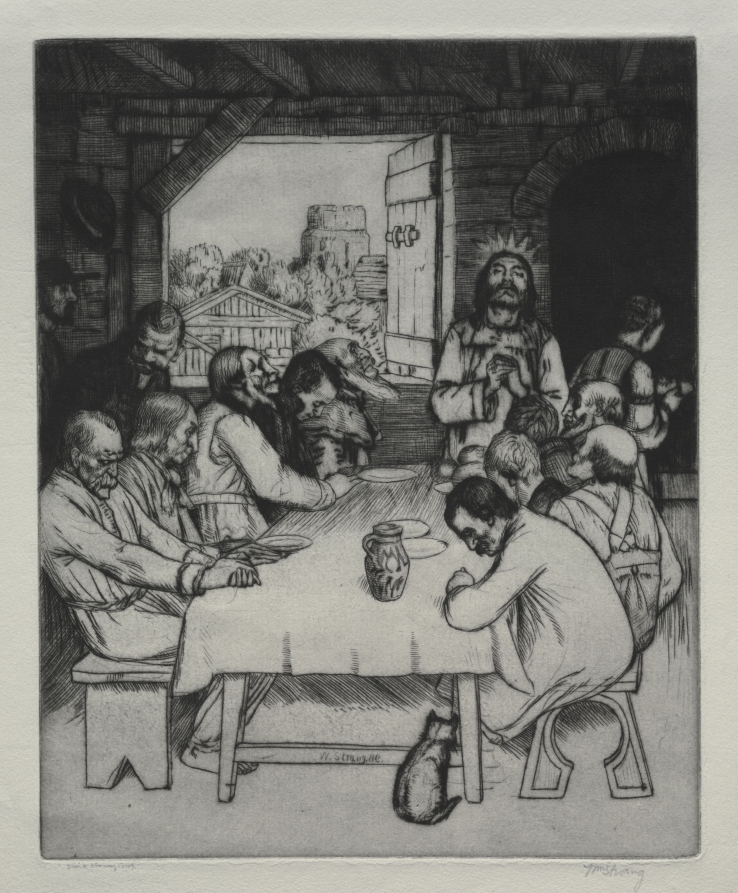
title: The Last Supper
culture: England, 19th century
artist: William Strang (British, 1859–1921)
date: 1889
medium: drypoint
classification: Print